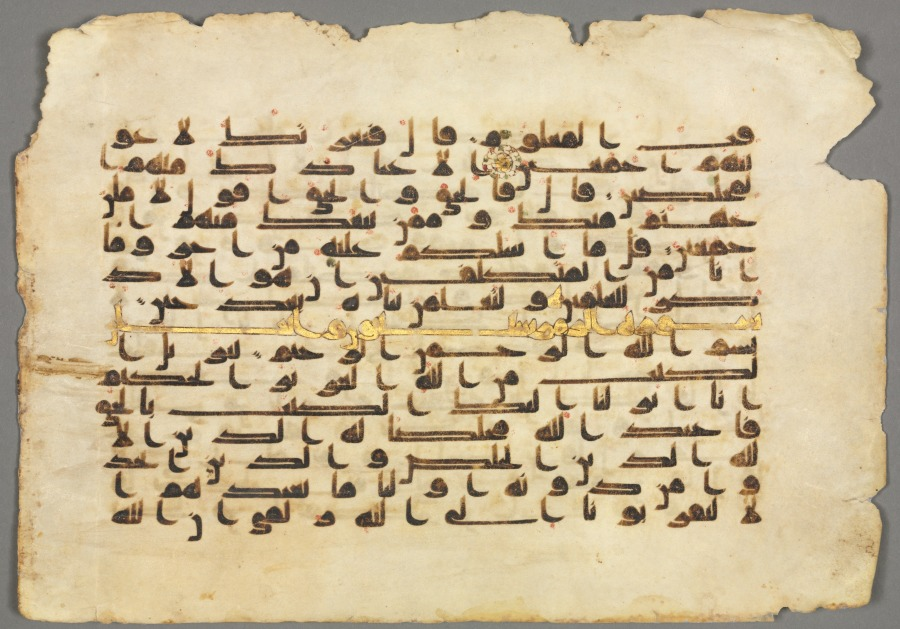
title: Qur'an Manuscript Folio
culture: Iran or Iraq, Abbasid period, 800s–900s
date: 800s–900s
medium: ink, gold, and color on parchment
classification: Calligraphy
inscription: Kufi script. Text: XXXVIII:81–88, XXXIX:1–3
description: This page features the last eight verses of the Sura al-Sad (named for the Arabic letter sad) and the opening verses of the Sura al-Zumar (the Companies); the latter begins: The sending down of the Book is from God the All-mighty, the All-wise. We have sent down to thee the Book with the truth; so worship God, making thy religion His sincerely.